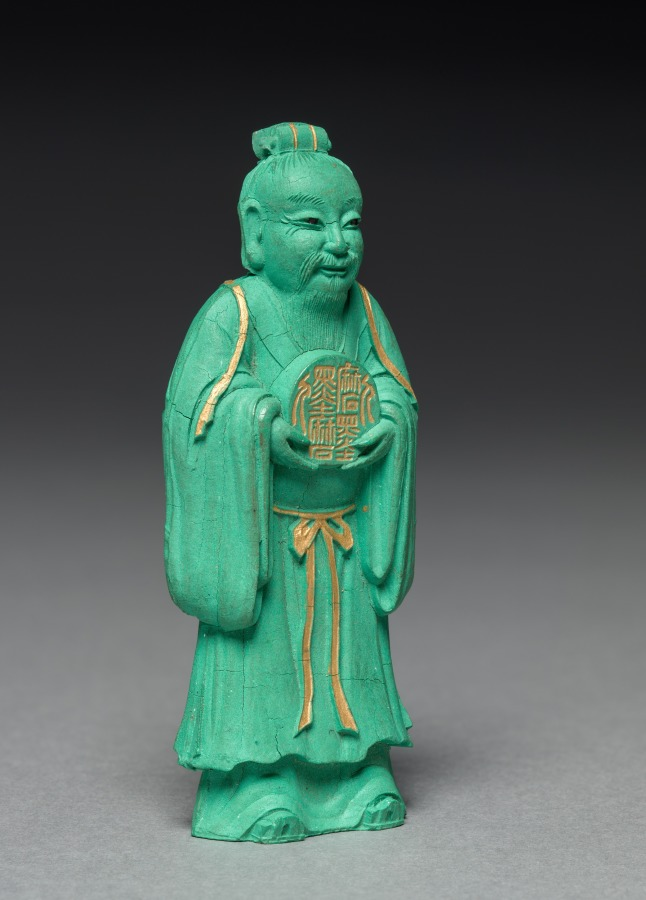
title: Ink Cake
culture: China, Qing dynasty (1644-1911)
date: late 19th Century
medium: ink cake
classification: Miscellaneous